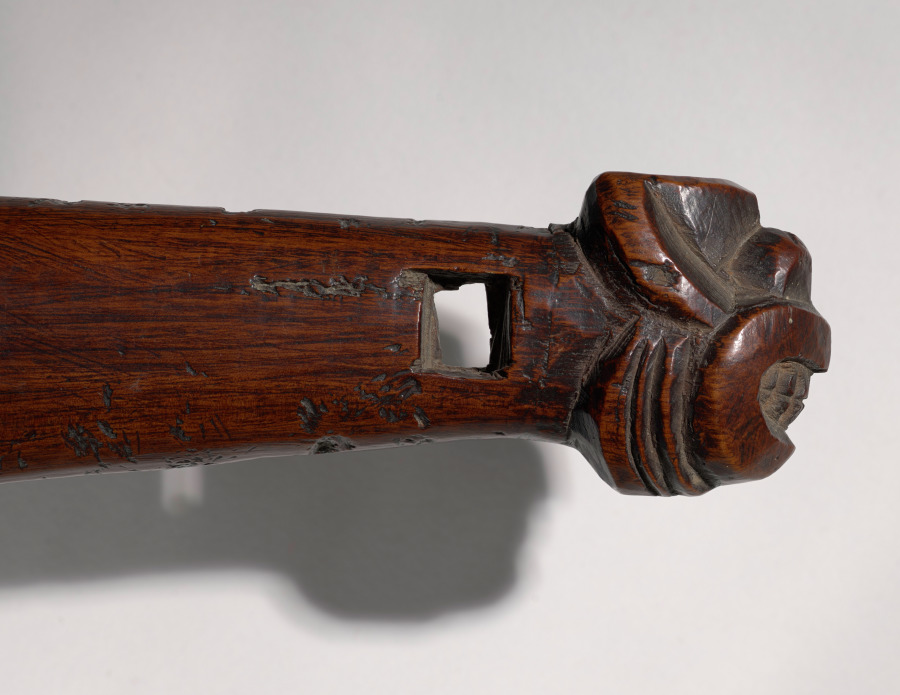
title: Short Club (Wahaika)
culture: Polynesia, New Zealand, Maori people, mid-19th Century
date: mid 1800s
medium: wood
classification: Sculpture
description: The wahaika, carried in a belt, was used by the Maori in hand-to-hand combat. Early, undecorated clubs were made of stone. Bone and wood clubs were decorated with increasingly complex carved designs. The small figure clinging to the side of this club may well represent the supernatural power (mana) of the weapon, while the face at the end of the grip expresses the aggression of combat.